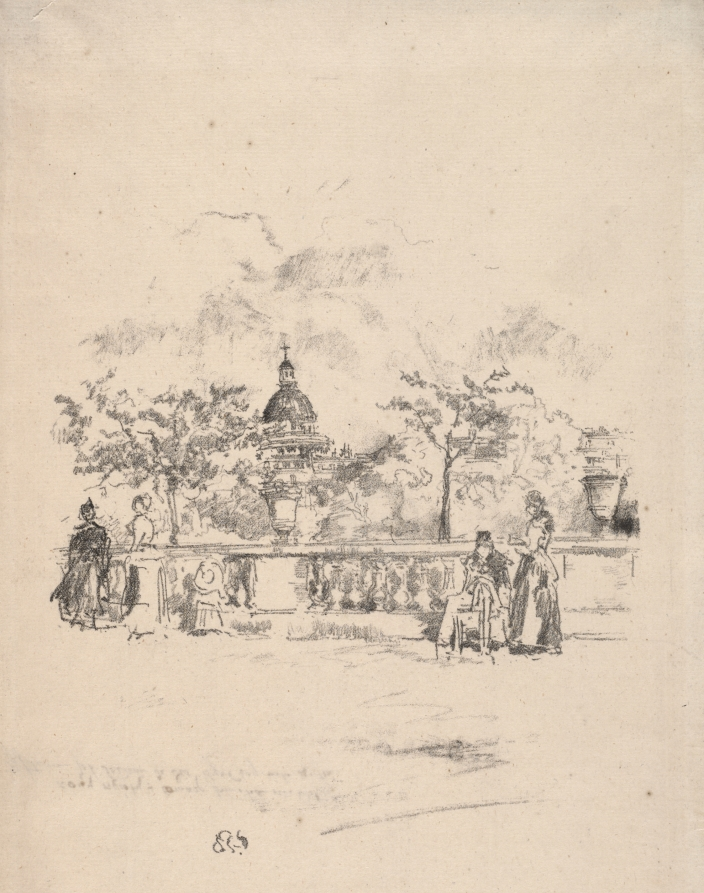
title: Pantheon from the Terrace of the Luxembourg Gardens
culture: America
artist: James McNeill Whistler (American, 1834–1903)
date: 1893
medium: lithograph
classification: Print